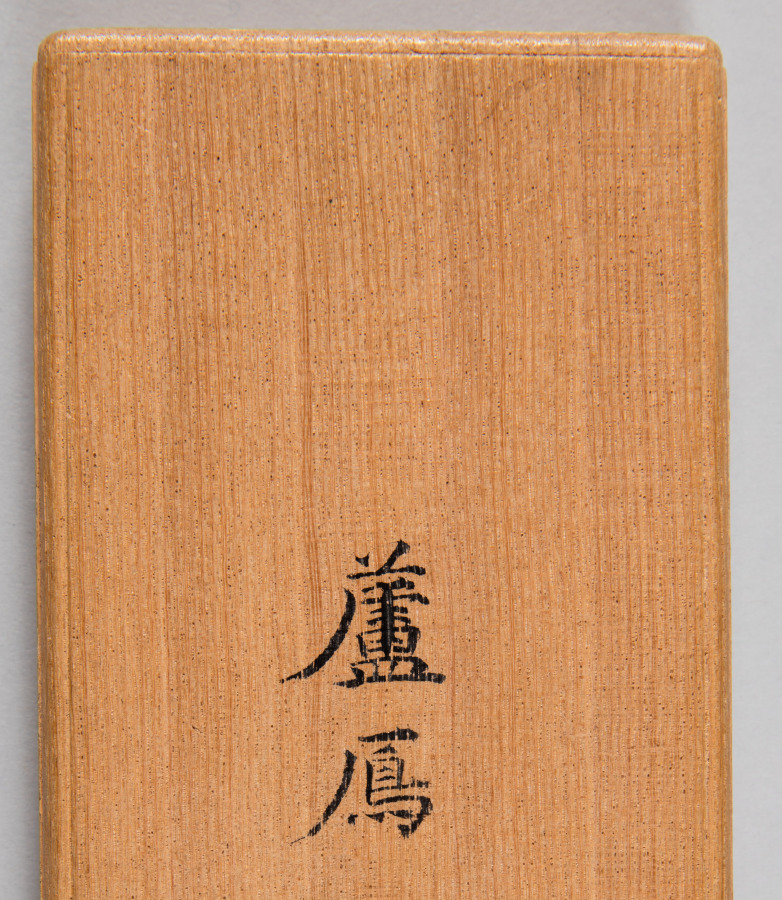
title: Reeds and Geese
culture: Japan, Kamakura period (1185–1333)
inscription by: Yishan Yining [Issan Ichinei] (Chinese, 1247–1317)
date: 1314–17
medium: hanging scroll; ink on paper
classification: Painting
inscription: signed: Issan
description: Reeds and geese has been a common pairing in Chinese literary and visual culture for many centuries. This painting presents the contribution of a Japanese amateur painter, almost certainly a Zen Buddhist monk, to Japan’s fledgling efforts to add the theme to its own cultural vocabulary in the early 1300s. As was customary at the time in Japan, the painter did not sign or seal his work; the inscription, a poem added to the painting by the eminent émigré monk Yishan Yining, along with his signature and seal, was of far greater cultural value. Today, the modestly sized painting has tremendous significance as one of the earliest surviving examples of Japanese ink paintings with reeds and geese.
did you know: Tokyo National Museum owns a copy of this painting made by Kano Gyokusen (1796–1864) when he was 14 years old.